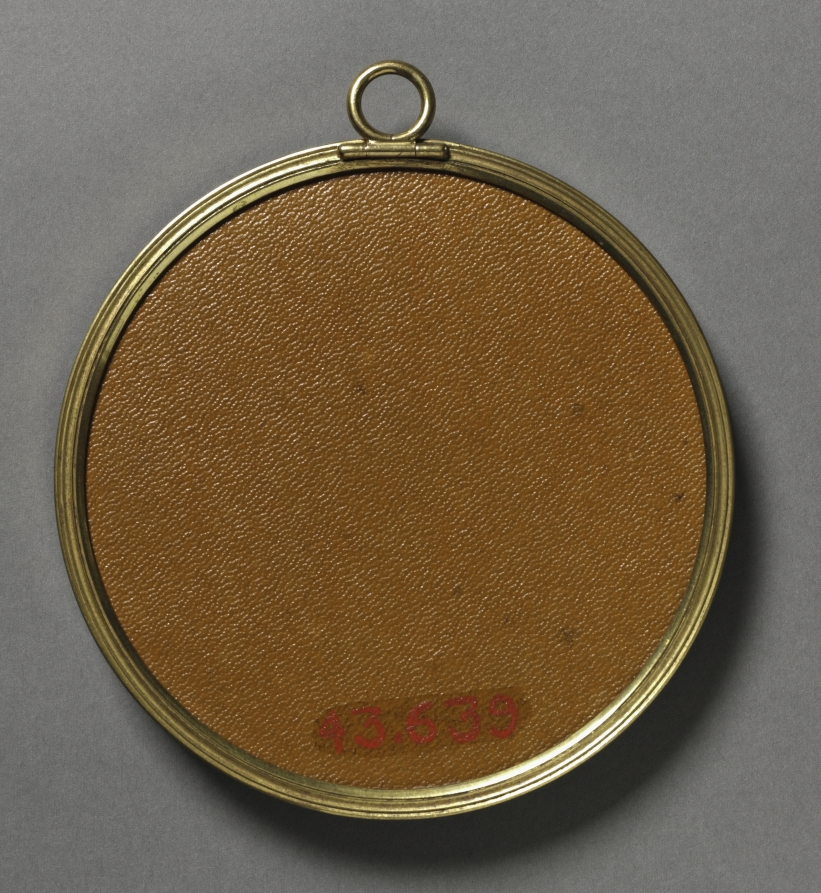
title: Portrait of Anne Vallayer-Coster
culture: France, 19th century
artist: François Dumont (French, 1751–1831)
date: 1804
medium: watercolor on ivory in a gilt metal and enamel frame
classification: Portrait Miniature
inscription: signed left: Dumont / f. 1804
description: Born in 1744, Anne Vallayer-Coster was a prominent still-life painter in France during the 1770s and 1780s. The daughter of a goldsmith, she grew up observing the intricacies of metalwork, acquiring an attention to detail apparent in her paintings. She was apprenticed to the seascape painter Joseph Vernet who encouraged her to pursue painting as a profession. In 1770 Vallayer-Coster sought membership in the exclusive French Académie Royale de Peinture et de Sculpture with the submission of two still-life paintings, "The Attributes of Painting, Sculpture, and Architecture" and "The Attributes of Music." She was accepted with full rights and privileges to the overwhelmingly male academy-the only woman to be granted membership during this period independent of royal support or ties to a male academician. Denis Diderot, a French art critic and philosopher, responded to her submissions: "It is certain that if all new members made a showing like Mademoiselle Vallayer's, and sustained the same high level of quality there, the Salon would look very different!" Since women were officially barred during the 18th century from studying the male nude from life, still-life painting was among the few genres open to female painters. Garnering a reputation as a beautiful socialite who possessed the painting skills usually ascribed to male history painters, she was the only woman to enjoy the honor of lodging in the Louvre under the invitation of Marie Antoinette, who greatly admired her work. Marie Antoinette herself was present at the artist's 1781 marriage to Jean-Pierre-Silvestre Coster in the halls of Versailles. Despite the close associations with Antoinette and her administration, Vallayer-Coster survived the French Revolution of 1789 and the Reign of Terror in 1793. Many of her patrons were not so fortunate, and the artist's production virtually stopped until 1804, when François Dumont painted this miniature. During this period, Vallayer-Coster struggled to reestablish herself among the elite of Paris. Over the course of 1804, she exhibited two works at the Salon and had two works commissioned by Empress Josephine de Beauharnais. Dumont's miniature depicts Vallayer-Coster holding a paintbrush in her right hand and a vase with flowers in her left, clearly an allusion to her skill as a still-life painter. Perhaps Vallayer-Coster requested that Dumont portray her as an artist in order to reassert her status as an important still-life painter. She may have intended to give the miniature to the empress in gratitude for her commissions and in the hope that there would be more to come. Her last major work, "Still Life with Lobster", was given to Louis XVIII and displayed at the Salon in 1817. Vallayer-Coster died in 1818 at the age of 74. Dumont worked closely with Marie Antoinette and, like Vallayer-Coster, grappled with diminished patronage after the queen's death and years of revolution. He attempted to reestablish his practice during the reigns of the Bourbon kings Louis XVIII and Charles X, but the competition provided by miniaturists like Jean-Baptiste Isabey (1767-1855) proved too strong. Dumont's exquisite portrait of Vallayer-Coster was produced during a time when both artist and sitter had fallen from the limelight and were struggling to prove their enduring relevance in the new regime. Ashley Bartman (May 2014)